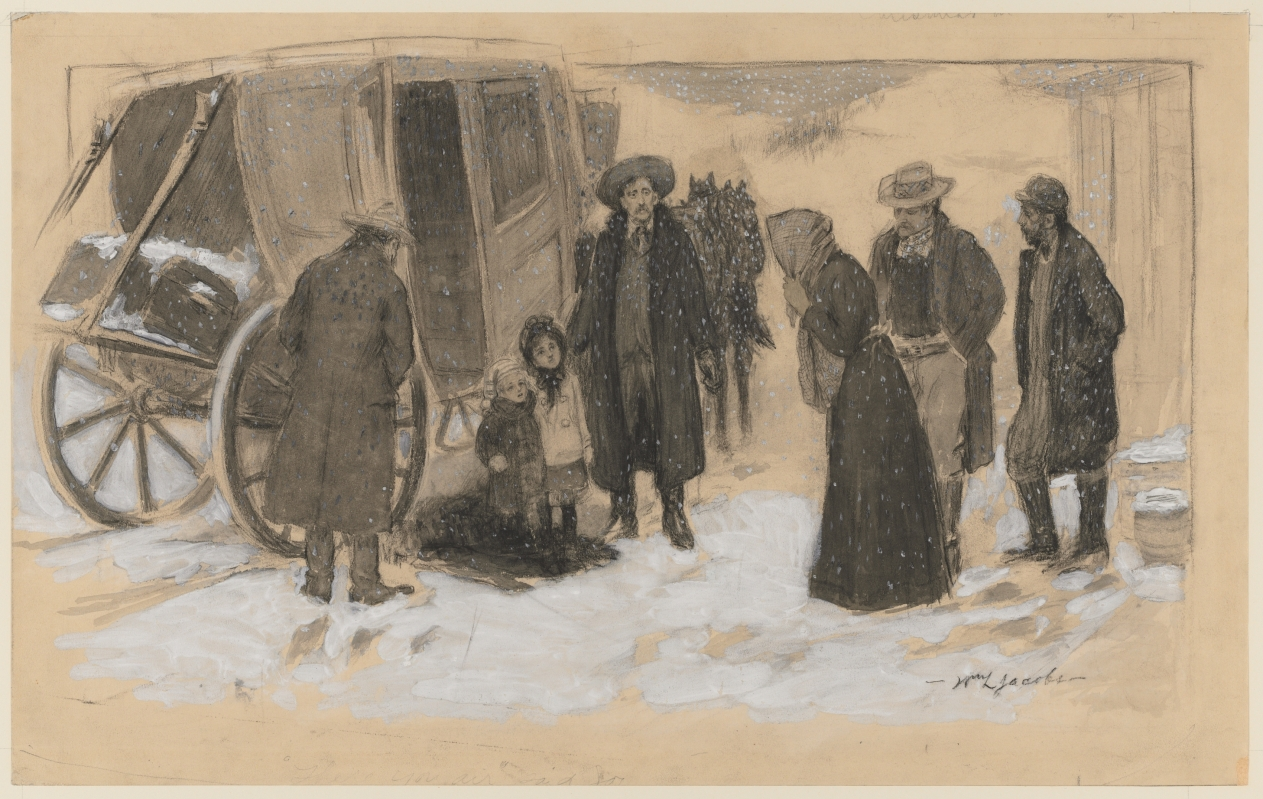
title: Sketch for "Christmas on the River"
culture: America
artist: William Leroy Jacobs (American, 1869–1917)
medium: watercolor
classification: Drawing